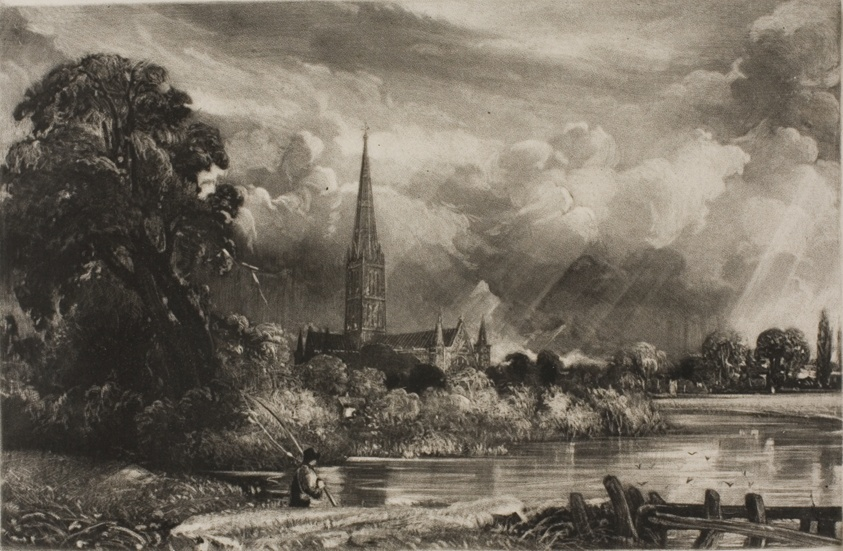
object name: Print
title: Salisbury Cathedral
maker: David Lucas (English, 1802-1881); after John Constable (English, 1776-1837)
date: 1831, published 1838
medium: Mezzotint in black on ivory wove paper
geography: England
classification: mezzotint; print; prints and drawing